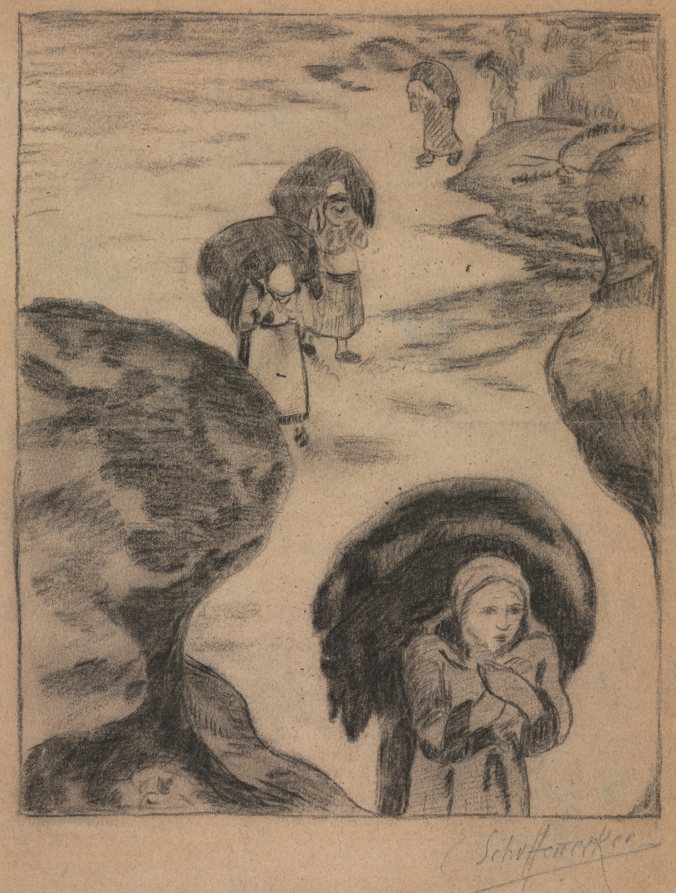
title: Seaweed Gatherers, Yport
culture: France, 19th century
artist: Claude-Emile Schuffenecker (French, 1851–1934)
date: c. 1889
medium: black chalk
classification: Drawing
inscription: signed, lower right, in graphite: Schuffenecker [underlined]; on verso, lower right, in graphite: P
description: Claude-Emile Schuffenecker worked closely with Paul Gauguin to form Synthetism, a style of art that broke from Impressionism in favor of flat planes of bold color and invented subjects. This drawing, which exists in two versions, is one of Schuffenecker’s most important works from the period. The other interpretation (owned by the Art Institute of Chicago) was featured in an influential 1889 exhibition organized by Gauguin and Schuffenecker at the Café Volpini on the grounds of the Universal Exposition. Both artists saw imagery of seaweed gatherers—a task undertaken by working-class people in rural French coastal towns—as exemplifying the simplicity they sought in their art.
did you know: This drawing is one of numerous depictions of seaweed gatherers that Claude-Emile Schuffenecker created throughout his career in various media.